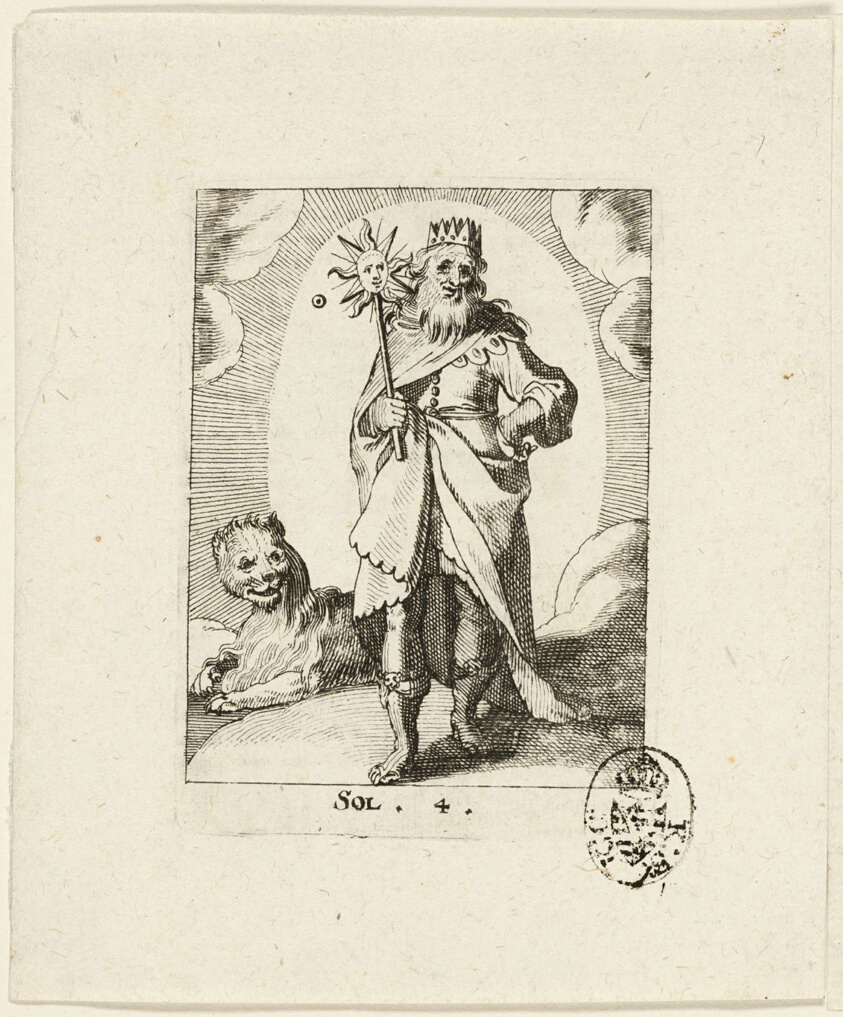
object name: Print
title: Sol, plate four from Der VII Planeten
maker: Conrad Meyer (Swiss, 1618-1689)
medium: Etching in black on ivory laid paper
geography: Switzerland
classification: etching; prints and drawing; print